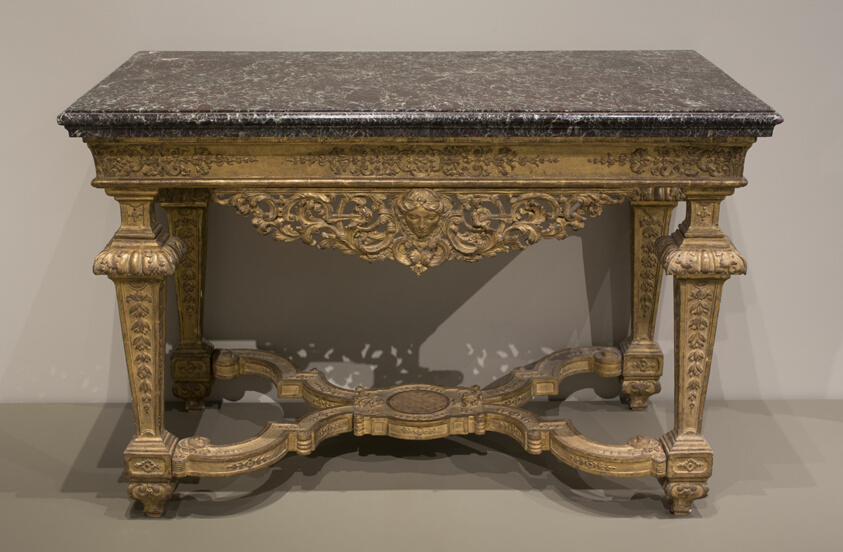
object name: Furniture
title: Pier Table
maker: France, Paris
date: 1685/90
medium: Carved, gessoed, and gilded wood, marble top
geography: France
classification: table; furniture; european decorative arts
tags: furniture